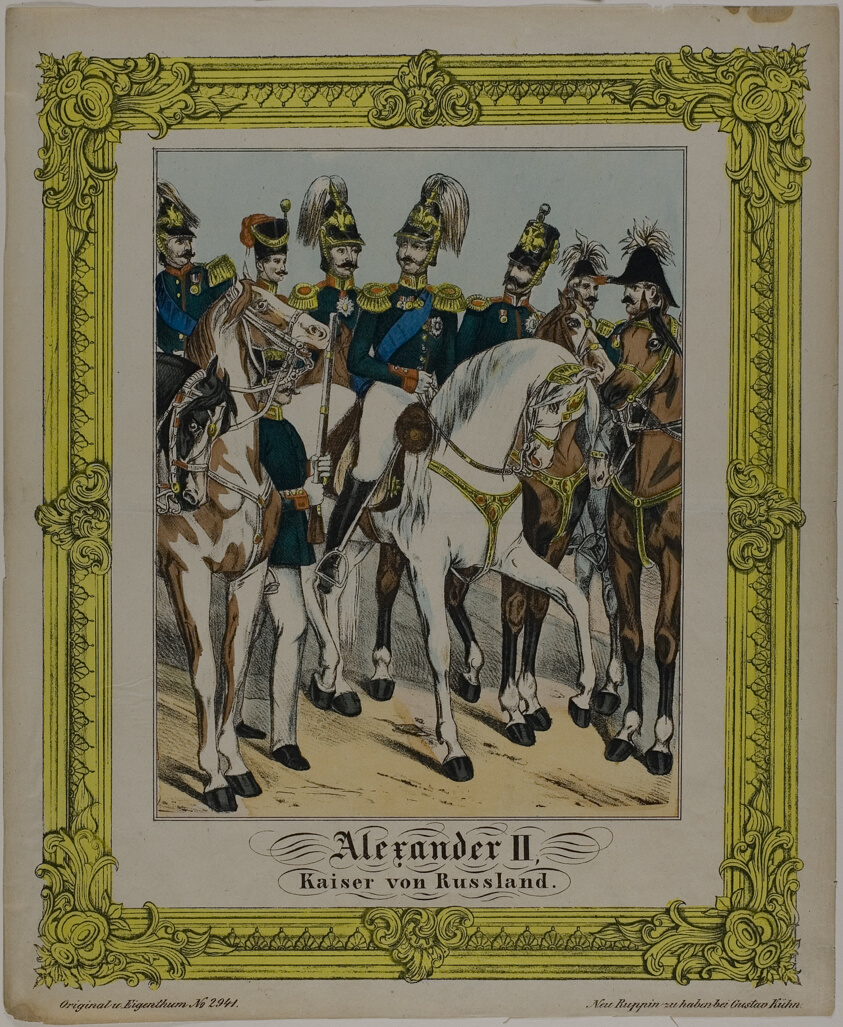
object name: Print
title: Alexander II, Emperor of Russia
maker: Unknown artist; published by Gustav Kuhn (German, 19th century)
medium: Handcolored lithograph on paper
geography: Germany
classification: lithograph; print; prints and drawing